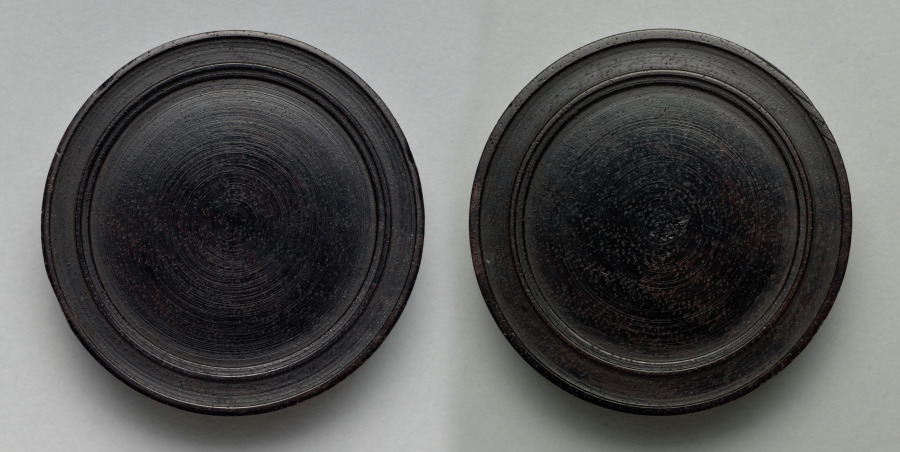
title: Gaming Piece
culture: Germany, late 17th-early 18th Century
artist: Martin Brunner (German, 1659–1725)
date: c.1700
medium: wood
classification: Furniture and woodwork